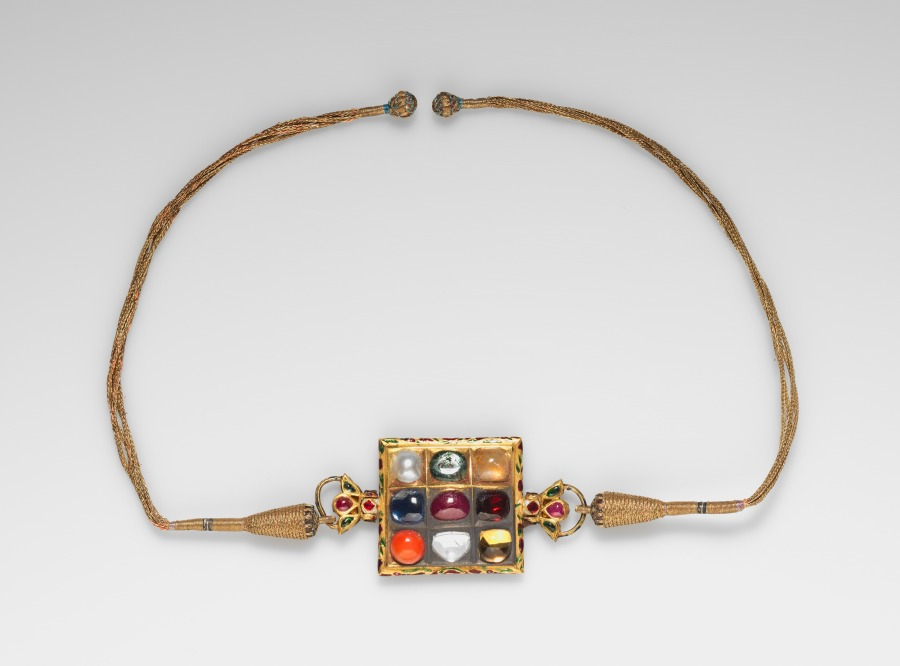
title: Wristlet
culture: India, Punjab (?)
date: 18th Century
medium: silver gilt with semiprecious stones and enamel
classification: Jewelry